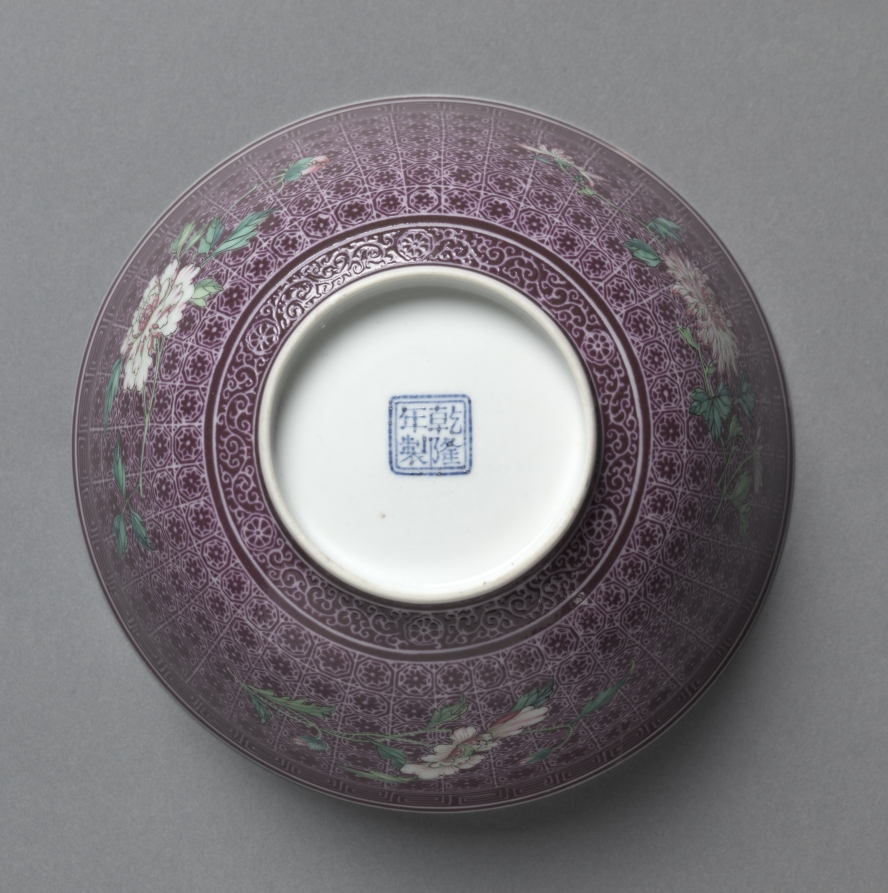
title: Bowl with Peony Sprays on Diaper Ground (exterior); Chrysanthemum Sprays (interior)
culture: China, Jiangxi Province, Jingdezhen, Qing dynasty (1644–1911), Qianlong mark and reign (1736–95)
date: 1736–95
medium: porcelain with famille rose overglaze enamel decoration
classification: Ceramic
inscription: 乾隆年製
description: The production of extraordinarily refined Qing imperial wares such as these could have involved the transportation of undecorated, plain porcelains from the imperial kilns in Jingdezhen, Jiangxi province, to the palace workshops in Beijing, where court painters applied the polychrome enamel decoration. The Qianlong reign mark on the base of the bowl is written with blue enamel over the transparent glaze.